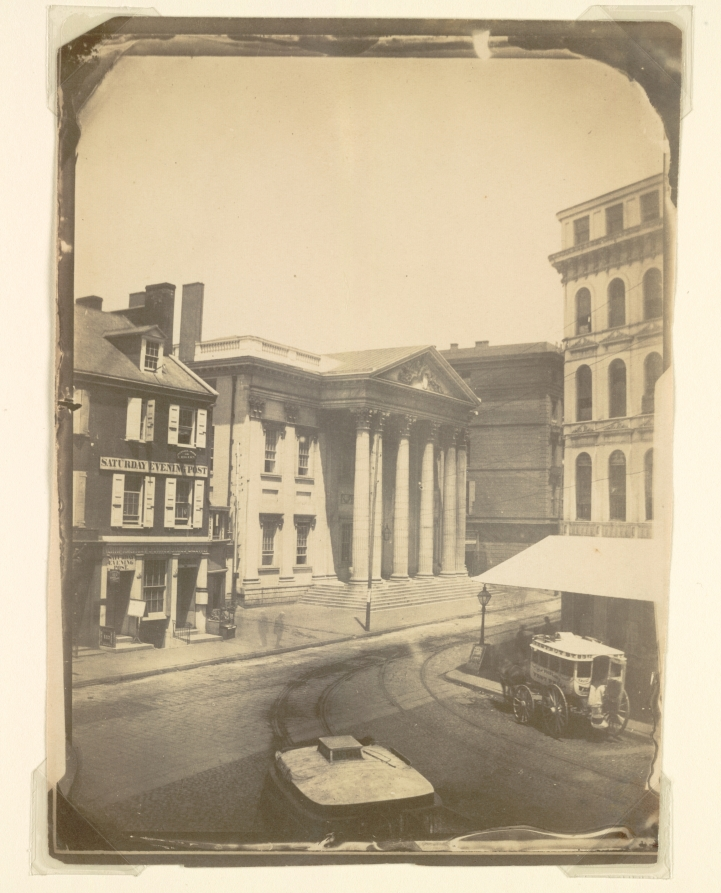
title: First Bank of the United States, Philadelphia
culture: America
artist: Frederick DeBourg Richards (American, 1822–1903)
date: 1859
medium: salted paper print from wet collodion negative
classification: Photograph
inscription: written in purple pencil on verso: "Girard Bank, 3rd + Dock sts"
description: Frederick DeBourg Richards, who was trained as a painter, was an accomplished Philadelphia photographer. His notoriety for complex architectural compositions was beautifully realized in this oblique, elevated view of the First Bank of the United States in Philadelphia. This warm-toned photograph, rich with detail, is a rare example of early cityscape photography. Designed by Samuel Blodgett with Joseph P. LeGrand, the bank resembles a marble mansion. Completed in 1797, it was probably the first building with a classic façade of marble to be erected in the United States. Indeed, the animated street life that Richards included was unusual for this period of photography.